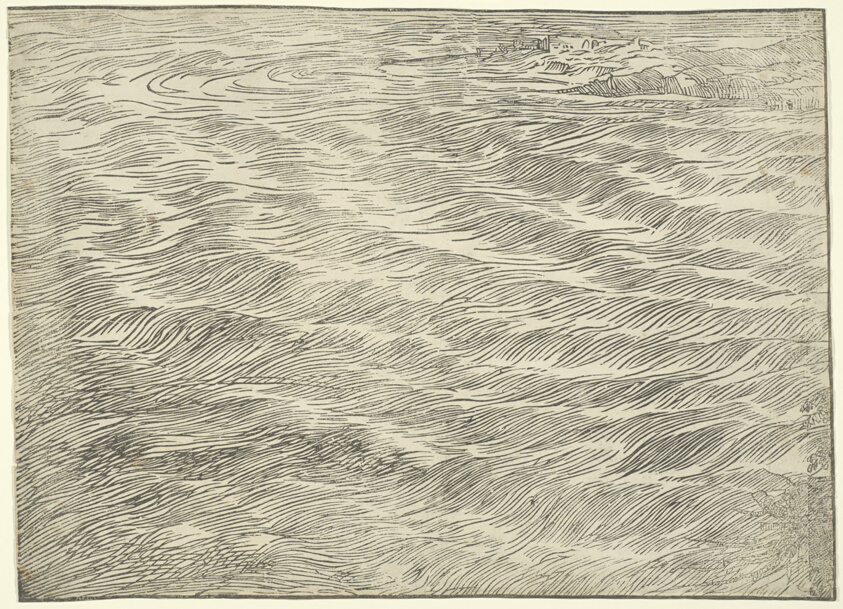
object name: Print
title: The Submersion of Pharaoh's Army in the Red Sea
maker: After Titian (Italian, c. 1488-1576); published by Domenico dalle Greche (Italian, active 1543-1558)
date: c. 1515, printed 1549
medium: Woodcut in black on ivory laid paper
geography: Italy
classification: woodcut; print; prints and drawing